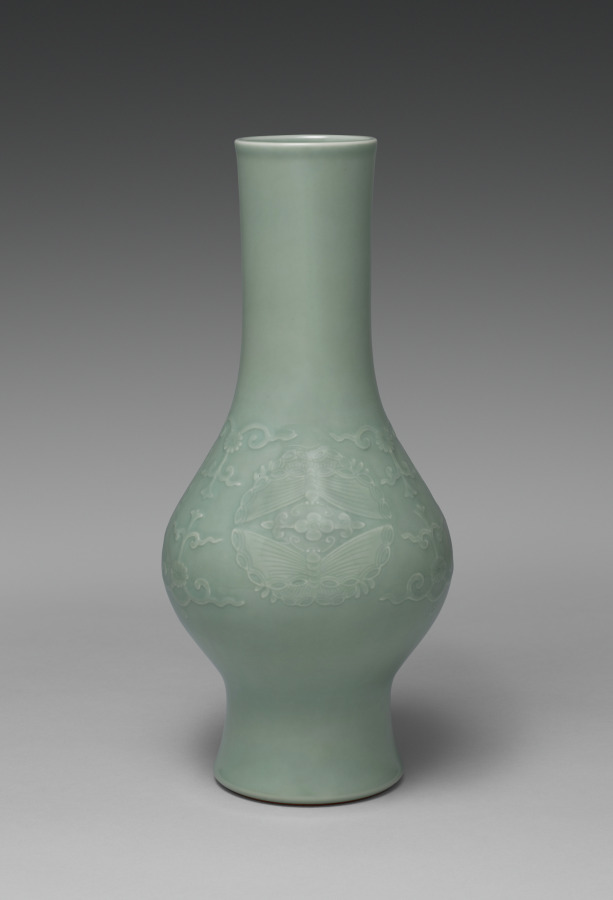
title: Flower Vase with Butterflies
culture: Japan, Meiji period (1868–1912)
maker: Seifū Yohei III (Japanese, 1851–1914)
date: 1907–14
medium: Porcelain with green glaze and carved and molded design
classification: Ceramic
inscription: 清風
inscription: 【印】 帝室技芸員。 【印】 清風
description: This flower vase has two pairs of butterflies forming low-relief roundels, one on each side. The butterflies face each other, one positioned above and the other below, their antennae curling up to a centrally placed floral motif. In the spaces between the pairs of insects, additional raised floral designs are set within vinelike extensions reminiscent of open metalwork banners and canopy adornments in Buddhist temples. The lip and the foot of the vase remain white, and the thinning of the green glaze within the higher-relief portions of the body decoration accentuates the designs. This work, like the sweets bowl CMA 2022.232, has a box lid attribution to Yohei III by Yohei IV. His inscription is dated to the autumn of 1919.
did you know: The box identifies the vase as in the hisokuyō (Chinese mise yao 秘色窯), or “mysterious color ware,” style.